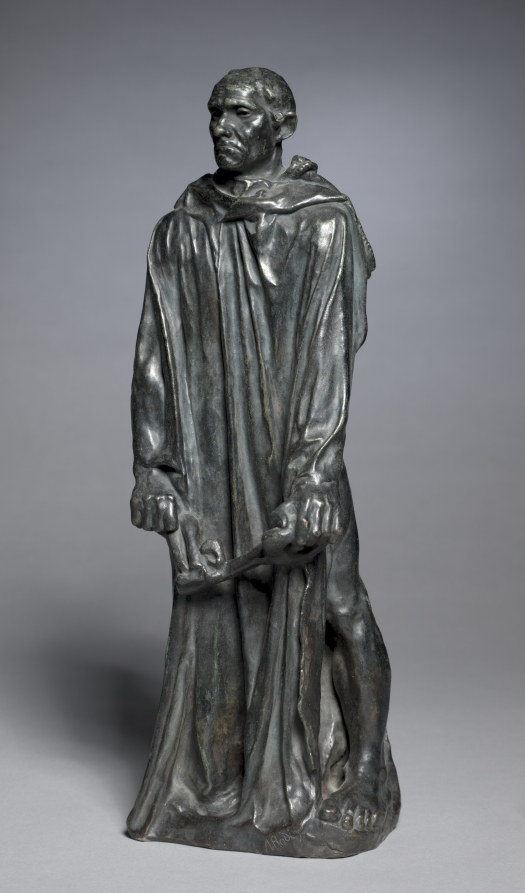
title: Jean d'Aire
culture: France, 19th century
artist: Auguste Rodin (French, 1840–1917)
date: 1884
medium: bronze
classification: Sculpture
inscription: signed front of base: "A. Rodin." Inscribed back of base: "Alexis Rudier/Fondeur, Paris."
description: In 1884 Rodin received a commission to create a large public monument honoring six French men who volunteered to be taken prisoner by an English army in exchange for the English releasing the town of Calais from a brutal 11-month siege. This reduced cast depicts one of the volunteers from the monument. Rather than idealized heroes, Rodin portrays the prominent citizens known as burghers as ordinary men experiencing personal confrontations with death. Jean d’Aire faces his fate with stoic resolve. The thick folds of his tunic weigh heavily on his body, as if symbolic of an internal struggle between his willingness to sacrifice his life and a desire to live. His intense glare into space seems to betray the dread and anxiety raging within his mind. Immensely popular as an independent sculpture, Rodin made numerous versions in various sizes.